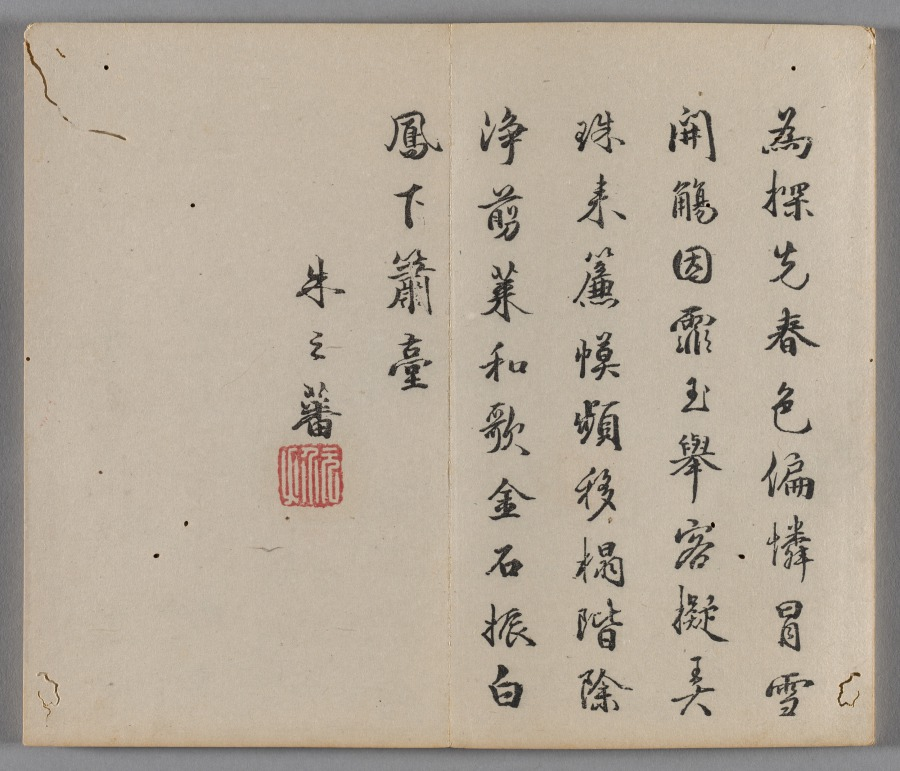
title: Ten Bamboo Studio Painting and Calligraphy Handbook (Shizhuzhai shuhua pu): Plum Blossoms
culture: China, Qing dynasty (1644-1911)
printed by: Hu Zhengyan (Chinese, c. 1584–1674)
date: 1633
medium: Woodblock-printed book; ink and colors on paper; first edition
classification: Print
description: Color printing reached a level of perfection in the early 1600s, as seen in this Ten Bamboo Studio Collection of Calligraphy and Painting and the Mustard Seed Garden Manual of Painting (printed 1679 and 1701). The painterly quality, precision in registering (aligning) the woodblocks, and harmonious colors made them the most successful color print editions in Chinese history. Both editions were printed and compiled in Nanjing, spread nationwide, and had a great impact on the arts in Japan and Korea.